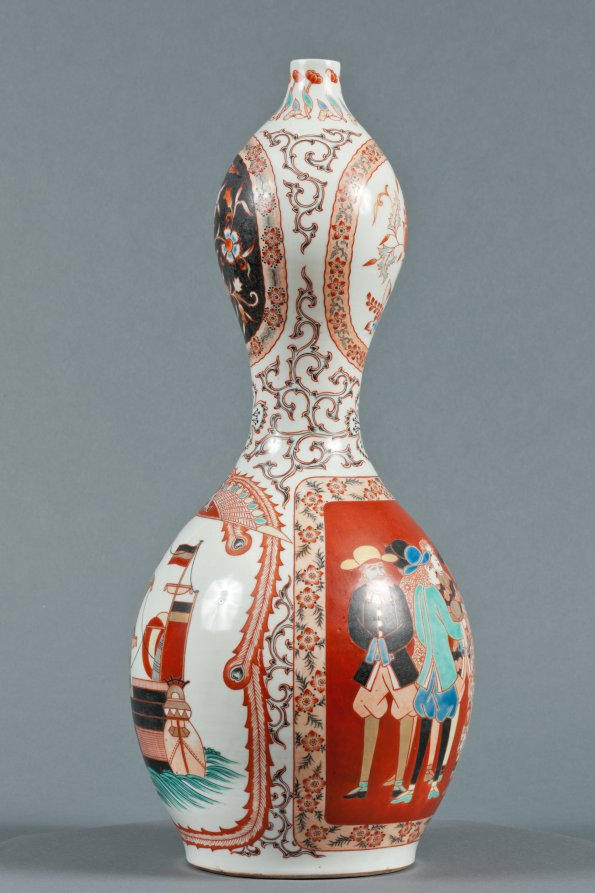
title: Bottle with Western Ships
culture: Japan, Edo period (1615–1868)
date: c. 1800–1868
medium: Porcelain with decoration in colored enamels and underglaze blue, overglaze enamels, and gold (Hizen ware, Arita type)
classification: Ceramic